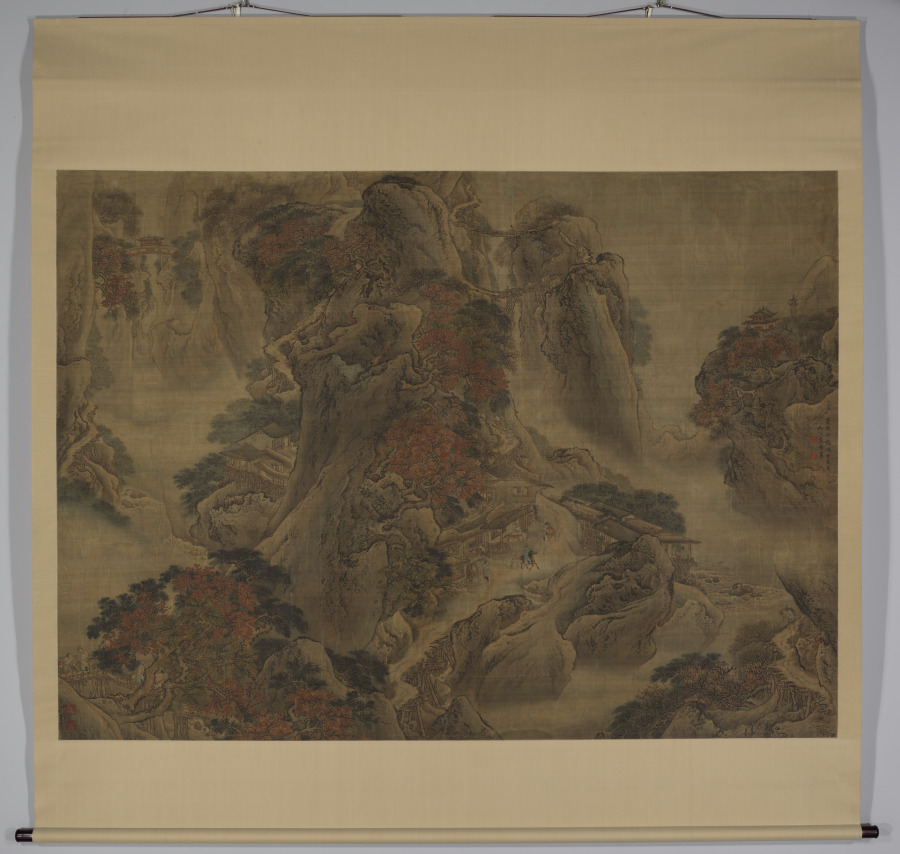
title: Road to Shu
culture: China, Qing dynasty (1644–1911), Qianlong reign (1736–95)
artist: Yuan Yao (Chinese, active mid-1700s)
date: 1743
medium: Hanging scroll; ink and color on silk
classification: Painting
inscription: artist's seals: yuan yao shi yin 袁耀 之印, zhao dao shi 昭道 氏 two collector’s seals: jin ju and illegible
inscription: Shu han xinglü //shi guihai xia //Hanshang Yuan Yao hua// 蜀椷行旅时癸亥夏- 邗上 袁耀 画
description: Few works by the Yuan workshops in Yangzhou present a continuous composition of such monumental scale as this hanging scroll. Road to Shu (in Sichuan province) depicts the trade of goods over long distances and through mountainous terrain. Busy travelers lead mules over footbridges, mountain paths wind along steep slopes, and soaring bridges connect peaks divided by deep gorges. The Yuan studios produced paintings to decorate the residences of wealthy Yangzhou salt merchants and princely palaces. The title Road to Shu refers to the historical drama of the flight of Tang emperor Xuanzong (reigned 712–56) to Sichuan in the aftermath of the An Lushan Rebellion (755–63). At the same time, the scenery alludes to Anhui, the mountainous native country of many of the salt merchants and their trade routes in northern parts of the empire.